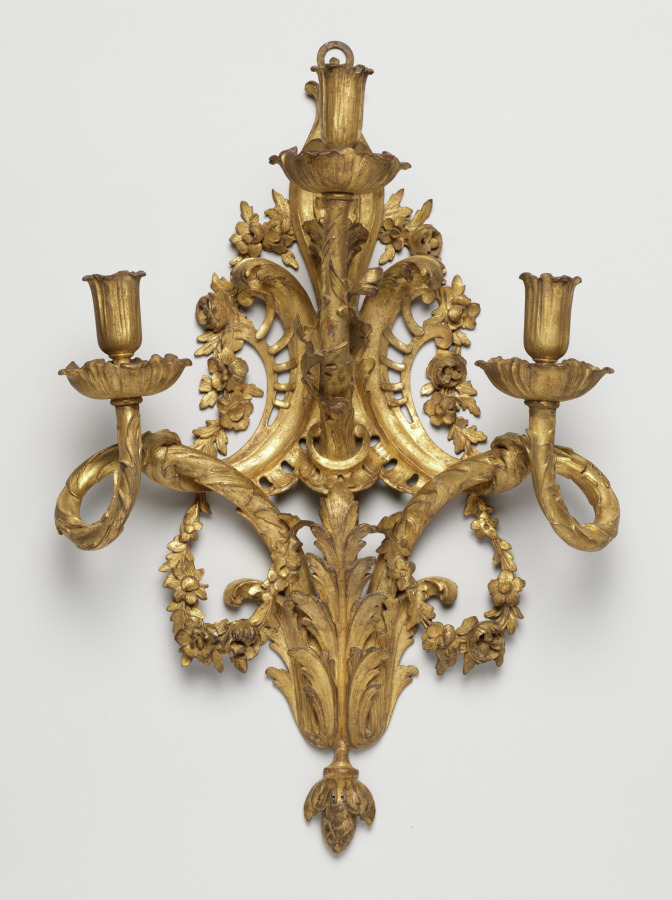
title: Candle Bracket (1 of 2)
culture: France, Transitional Style, Louis XV to Louis XVI, 18th century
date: c. 1765–1775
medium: gilded wood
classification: Furniture and woodwork